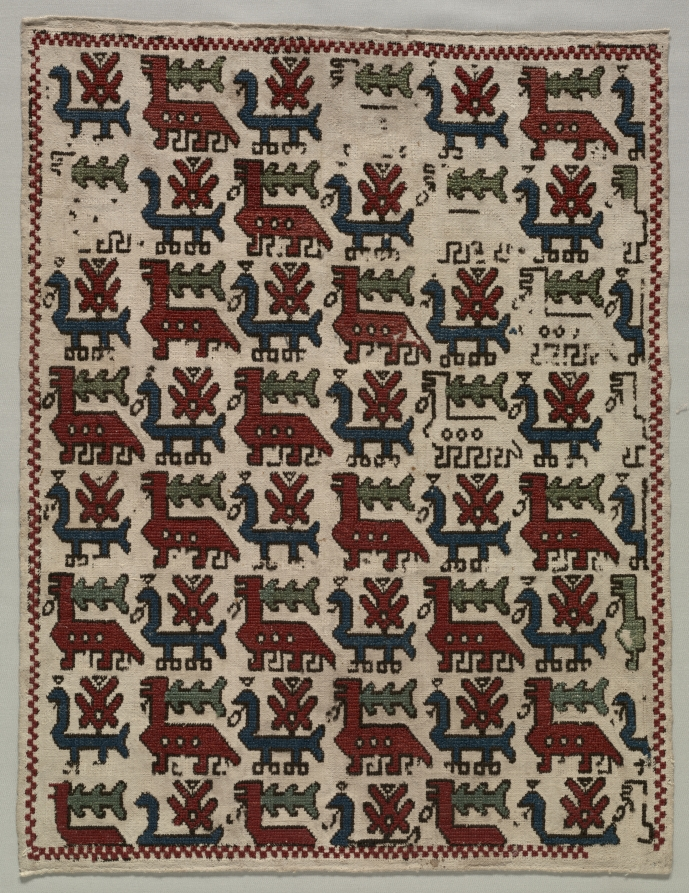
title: Pillow Cover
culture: Greece, Ionian Islands, 19th century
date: 1800s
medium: embroidery: silk on linen tabby ground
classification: Embroidery